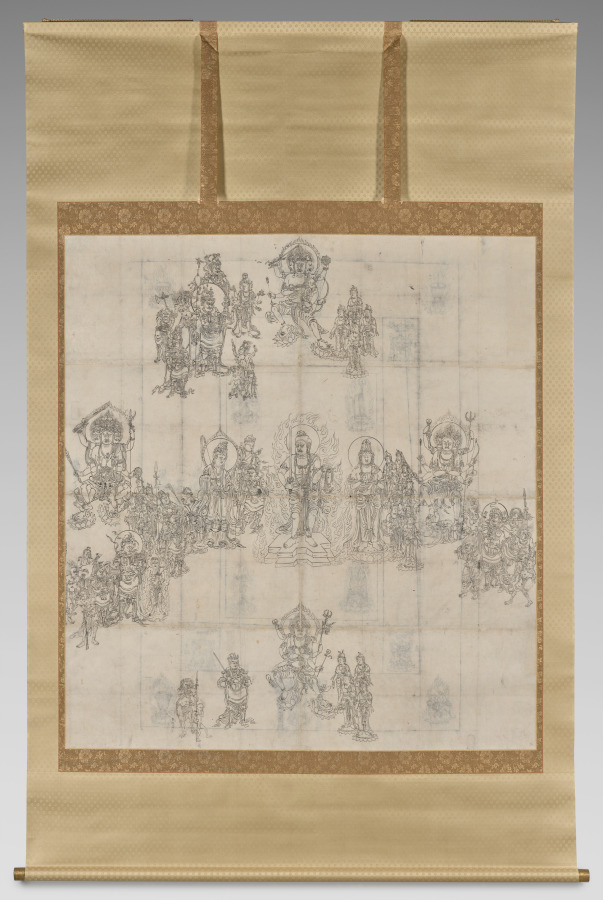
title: Iconographical Sketch (Zuzō) for the "Benevolent Kings Sutra Mandala"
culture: Japan, Heian period (794–1185)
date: 1100s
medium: Hanging scroll; ink on paper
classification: Painting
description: The Benevolent Kings Sutra has been a highly valued Buddhist scripture in Japan since the Nara period (710–794), when it started to be recited in a ceremony to pray for the peace and protection of the country. In the 800s, the monk Kūkai brought back from China a new translation of the text as well as Buddhist iconographic sketches to perform the rituals based on the sutra. Five scroll sets of copies of the original sketches brought by Kūkai are preserved in Daigoji and Tōji temples in Kyoto. This sketch, which has figural depictions of deities on the front and deities symbolized by objects on the back, differs in some ways from each of those sets, and represents an alternate approach to creating a mandala based on the Benevolent Kings Sutra.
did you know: The deity at the center is Fudō Myōō, the Immovable One.